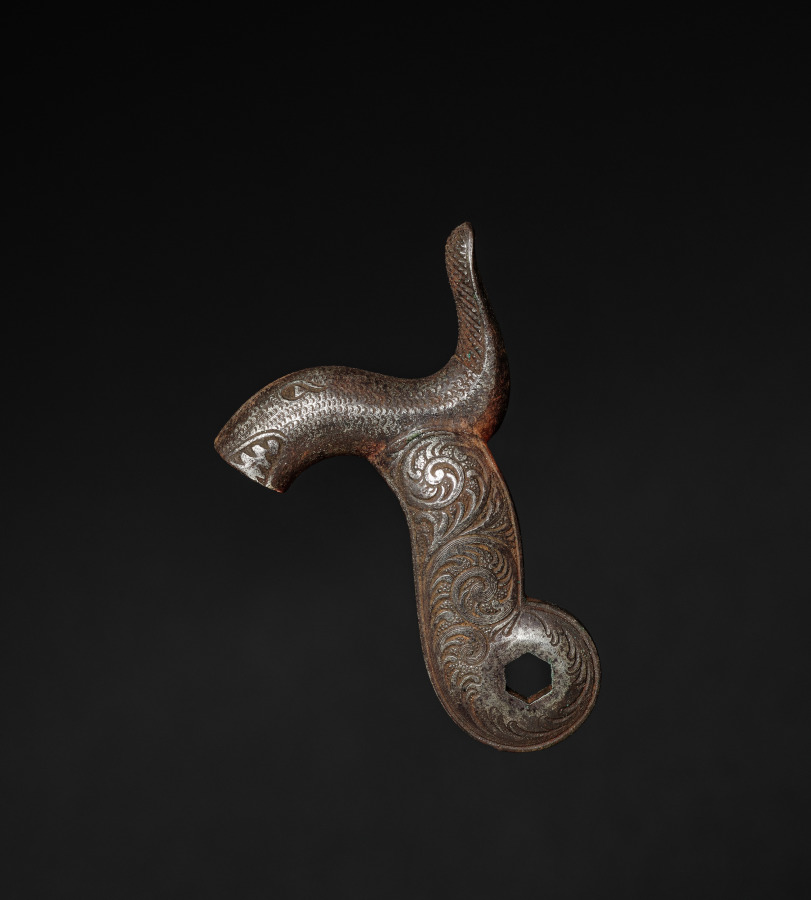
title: Gun-Lock Hammer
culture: England, early 19th century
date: c. 1800–1825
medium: steel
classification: Arms and Armor